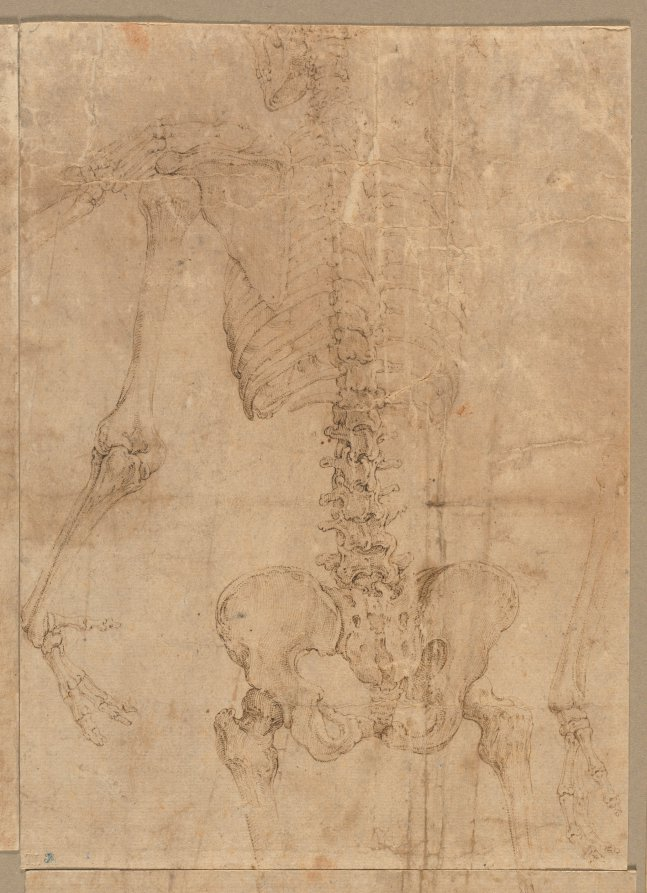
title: Upper Half of Skeleton from the Back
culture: Italy, 16th century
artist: Battista Franco (Italian, c. 1510–1561)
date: early 1540s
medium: pen and brown ink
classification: Drawing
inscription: VERSO OF SECONDARY SUPPORT, lower left, in graphite: 3.